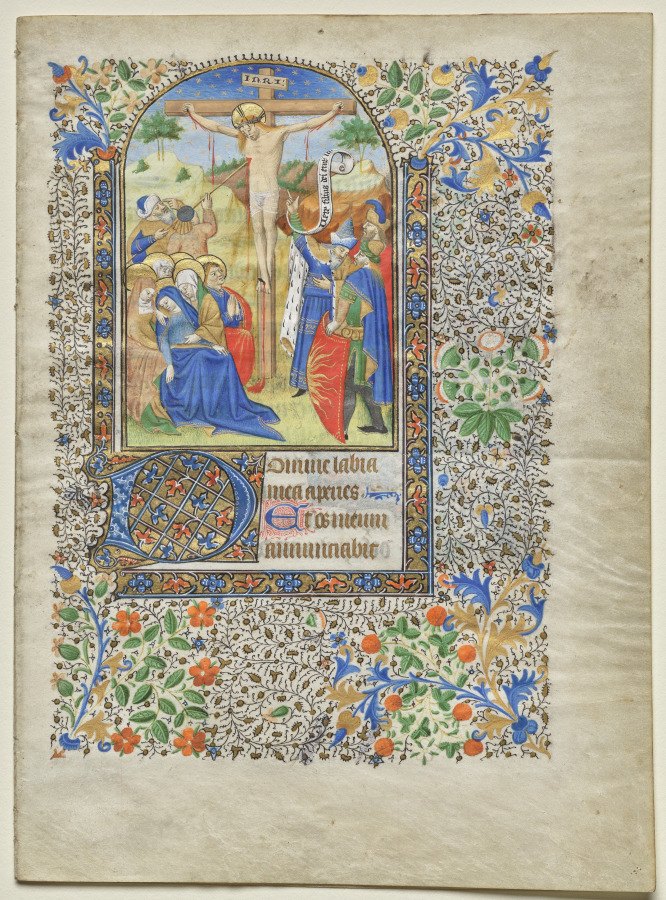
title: Bifolio from a Book of Hours: The Crucifixion: Hours of the Cross (recto)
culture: France, Angers, Nantes, or Poitiers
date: c. 1435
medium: ink, tempera, and gold on vellum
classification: Manuscript